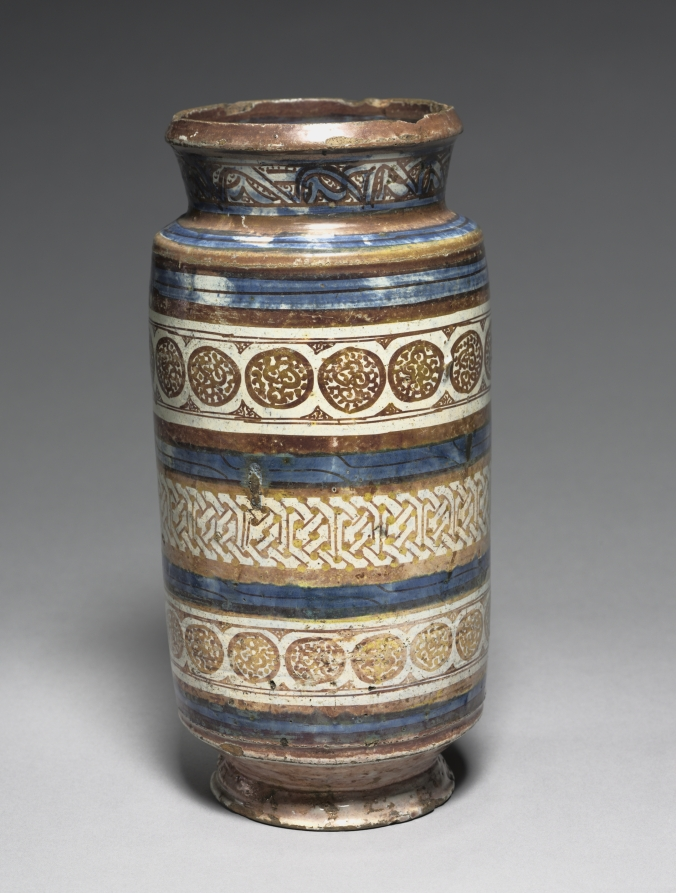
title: Albarello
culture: Spain, Manises, 15th century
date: c. 1400–1420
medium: tin-glazed earthenware, brown lustre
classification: Ceramic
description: An albarello is a type of pharmacy jar for dried medicinal herbs. The geometric ornament was inspired by contemporary Islamic designs in Muslim-occupied Spain.